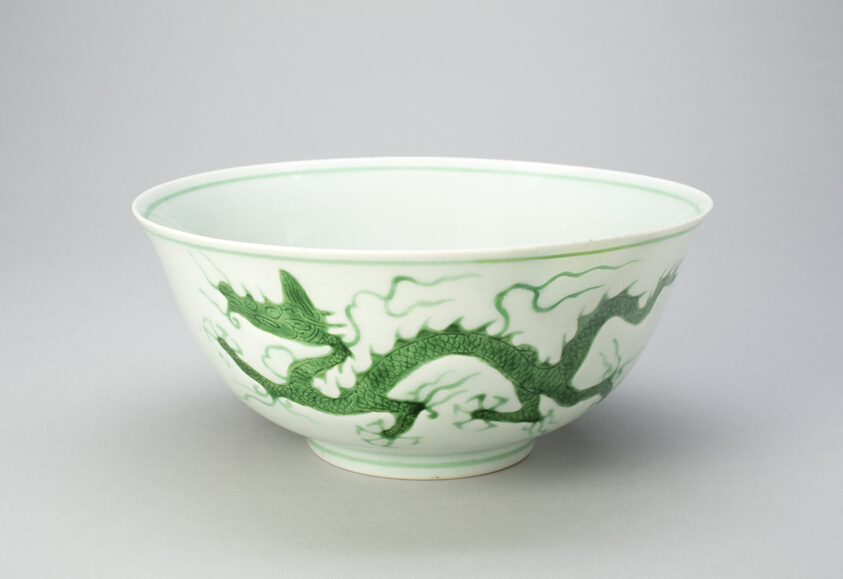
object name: Vessel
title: Bowl with Dragons Chasing a Flaming Pearl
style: Chinese (culture or style)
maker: China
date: Ming dynasty (1368–1644), Zhengde reign mark and period (1506–1521)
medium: Porcelain with incised and overglaze enamel decoration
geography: China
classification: bowl; porcelain; dish (vessel); asian art; ceramics; vessel